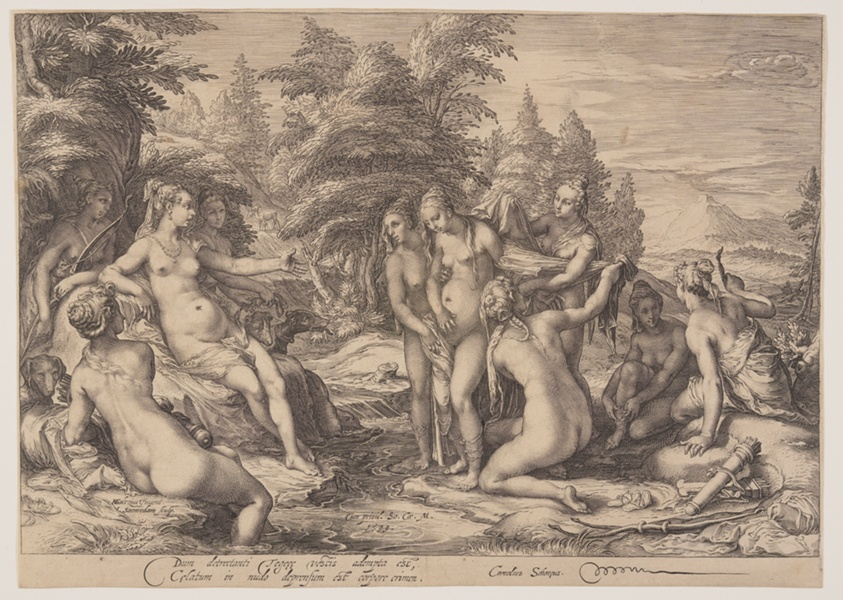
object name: Print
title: Diana and Callisto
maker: Jan Saenredam (Dutch, 1565–1607); after Hendrick Goltzius (Dutch, 1558-1617)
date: 1599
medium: Engraving on ivory laid paper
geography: Netherlands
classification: print; paper; prints and drawing; engraving